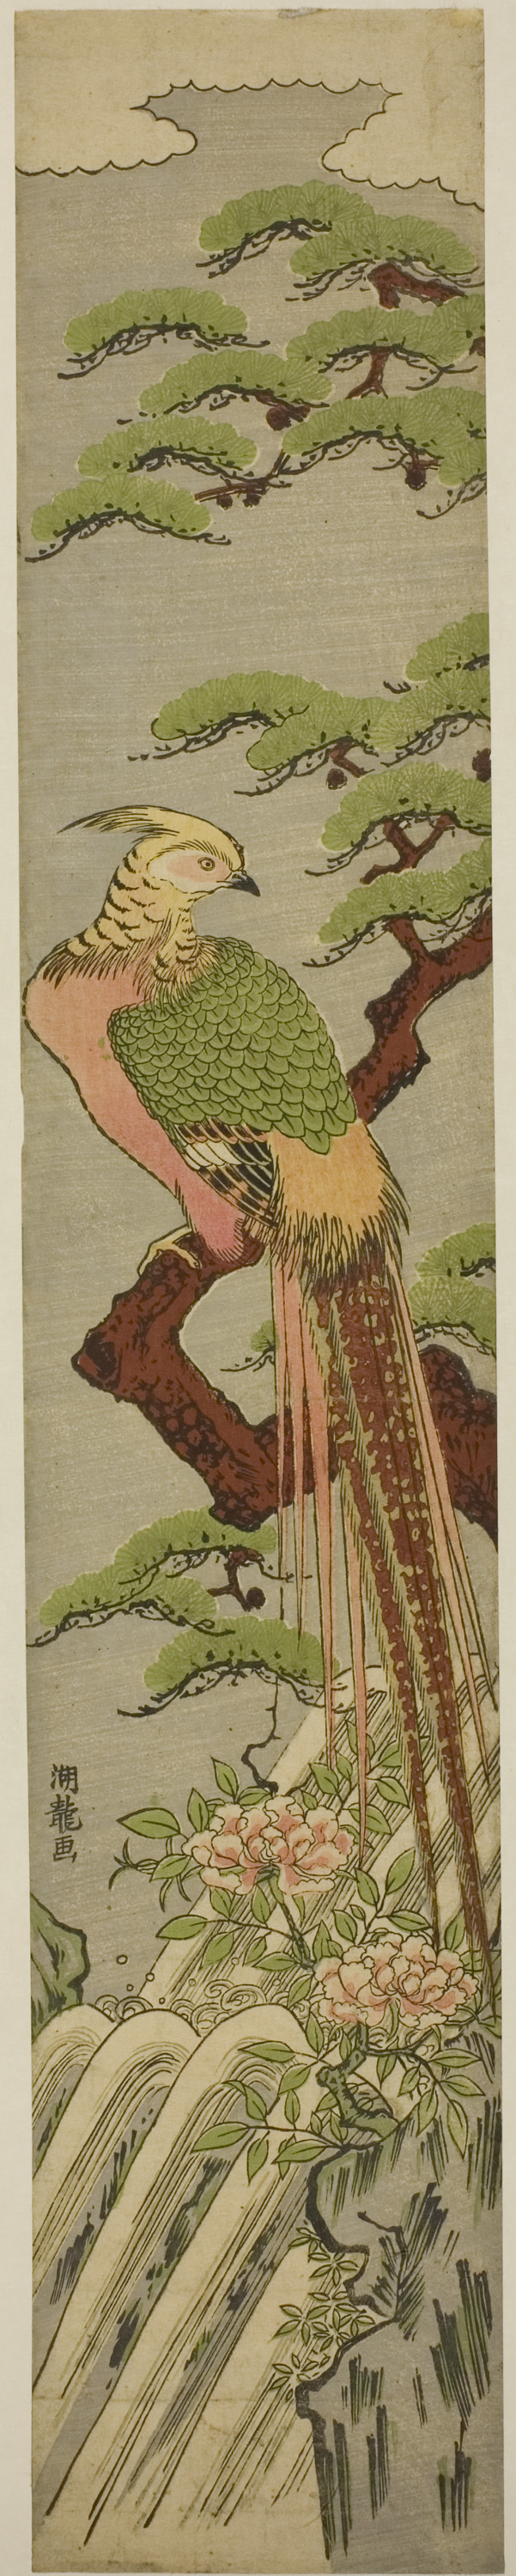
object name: Print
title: Golden Pheasant on a Pine Tree above Peonies and Waterfall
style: Japanese (culture or style)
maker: Isoda Koryusai (Japanese, 1735-1790)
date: c. 1780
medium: Color woodblock print; hashira-e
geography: Japan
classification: woodblock print; print; asian art